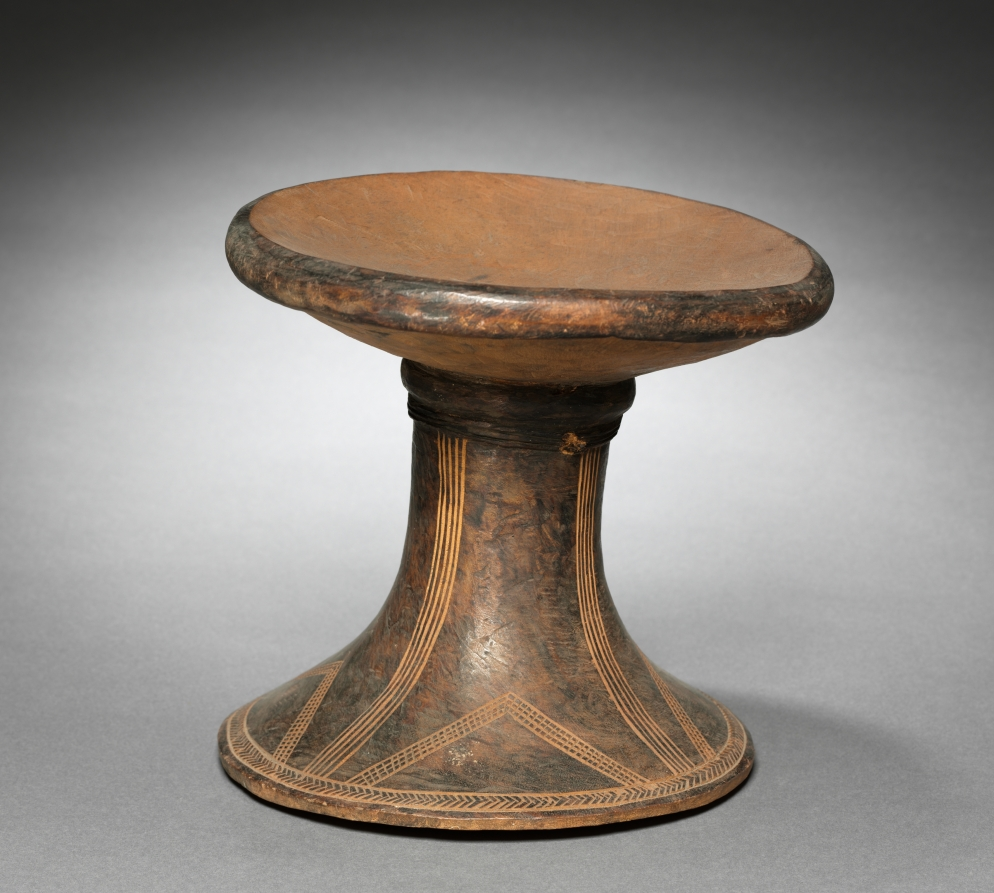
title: Stool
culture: Central Africa, Democratic Republic of the Congo, Nyanga, early 20th Century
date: before 1929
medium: wood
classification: Furniture and woodwork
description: Carved from a single piece of wood, Nyanga stools like this were multipurpose and took on different meanings depending on their use. Shaped like a curved hourglass, the shiny, patinated surface is textured with incised geometric designs. One use was for young male initiates to sit on as they received gifts from relatives following circumcision rites. The stools were oiled for the occasion, which results in the smooth, colored texture visible today.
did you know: This stool isn't asymmetrical, it's ergonomic! The seat tilts to make it more comfortable to use.